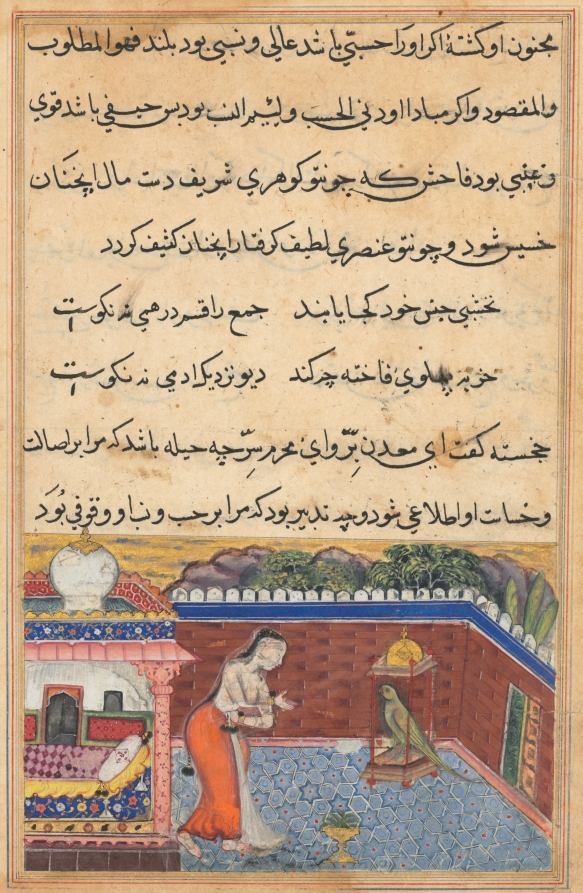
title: The parrot addresses Khujasta at the beginning of the thirty-first night, from a Tuti-nama (Tales of a Parrot)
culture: Mughal India, court of Akbar (reigned 1556–1605)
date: c. 1560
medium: gum tempera, ink, and gold on paper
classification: Painting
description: On the thirty-first of fifty-two nights, Tuti the talking parrot begins to tell Khujasta a moralizing story about a blue jackal who, through trickery, briefly became the emir of wild beasts. The original underdrawing in black and red is visible beneath the flaked paint on Khujasta’s face and upper body.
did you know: The painting depicting the blue jackal is in the Edwin Binney 3rd Collection of the San Diego Museum of Art (1990.273).